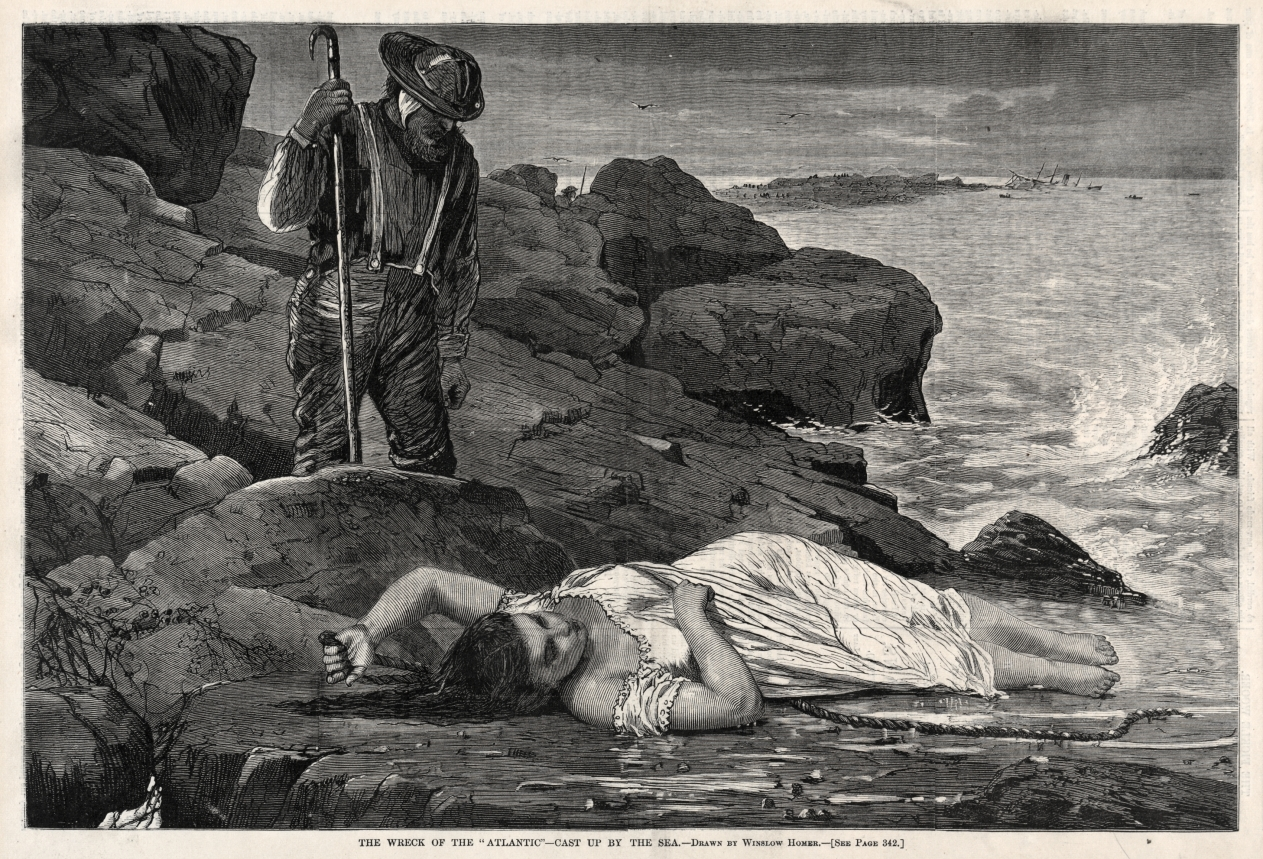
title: The Wreck of the "Atlantic" - Cast Up by the Sea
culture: America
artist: Winslow Homer (American, 1836–1910)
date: 1873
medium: wood engraving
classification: Print